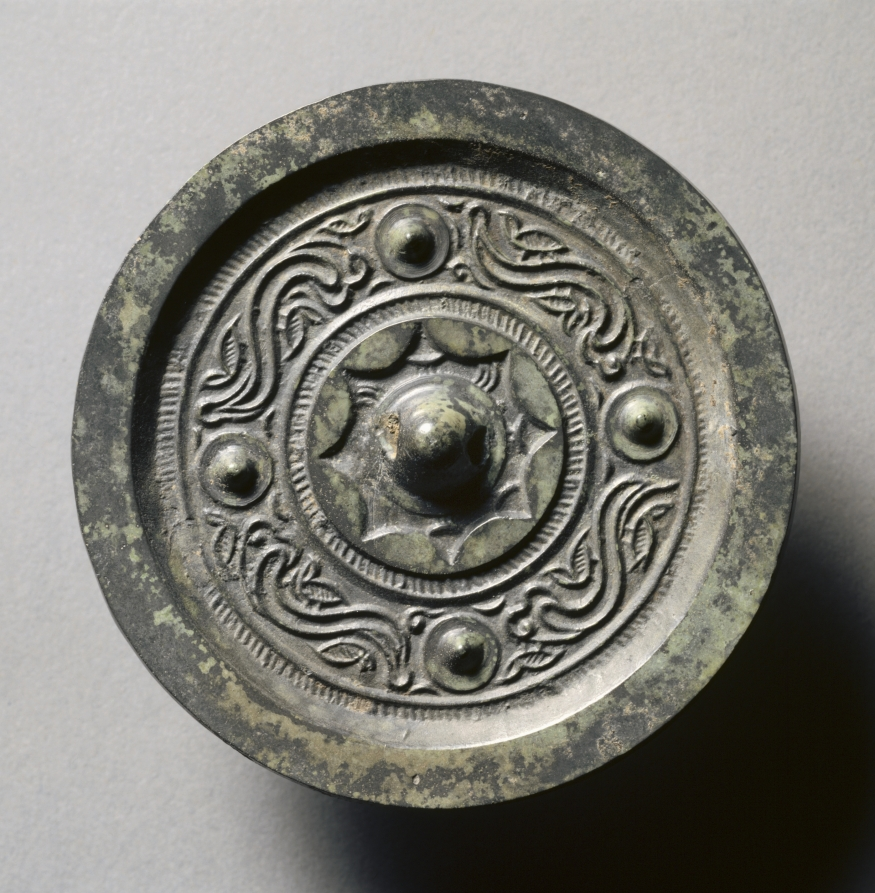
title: Mirror with Four Nipples, Quasi-Dragons, and Birds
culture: China, Western Han dynasty (206 BCE–8 CE)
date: late 300s BCE–50 CE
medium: bronze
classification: Metalwork